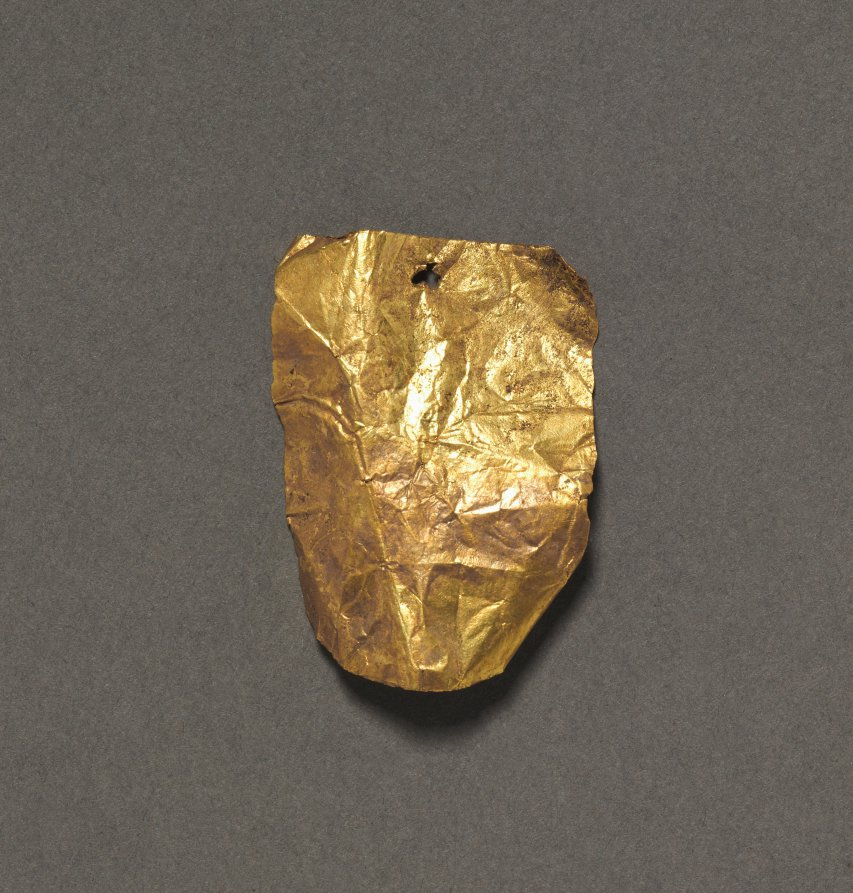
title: Tongue Plate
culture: Egypt, Greco-Roman period (332 BCE–395 CE), Roman empire (30 BCE–395 CE)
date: 30 BCE–395 CE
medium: gold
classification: Funerary Equipment